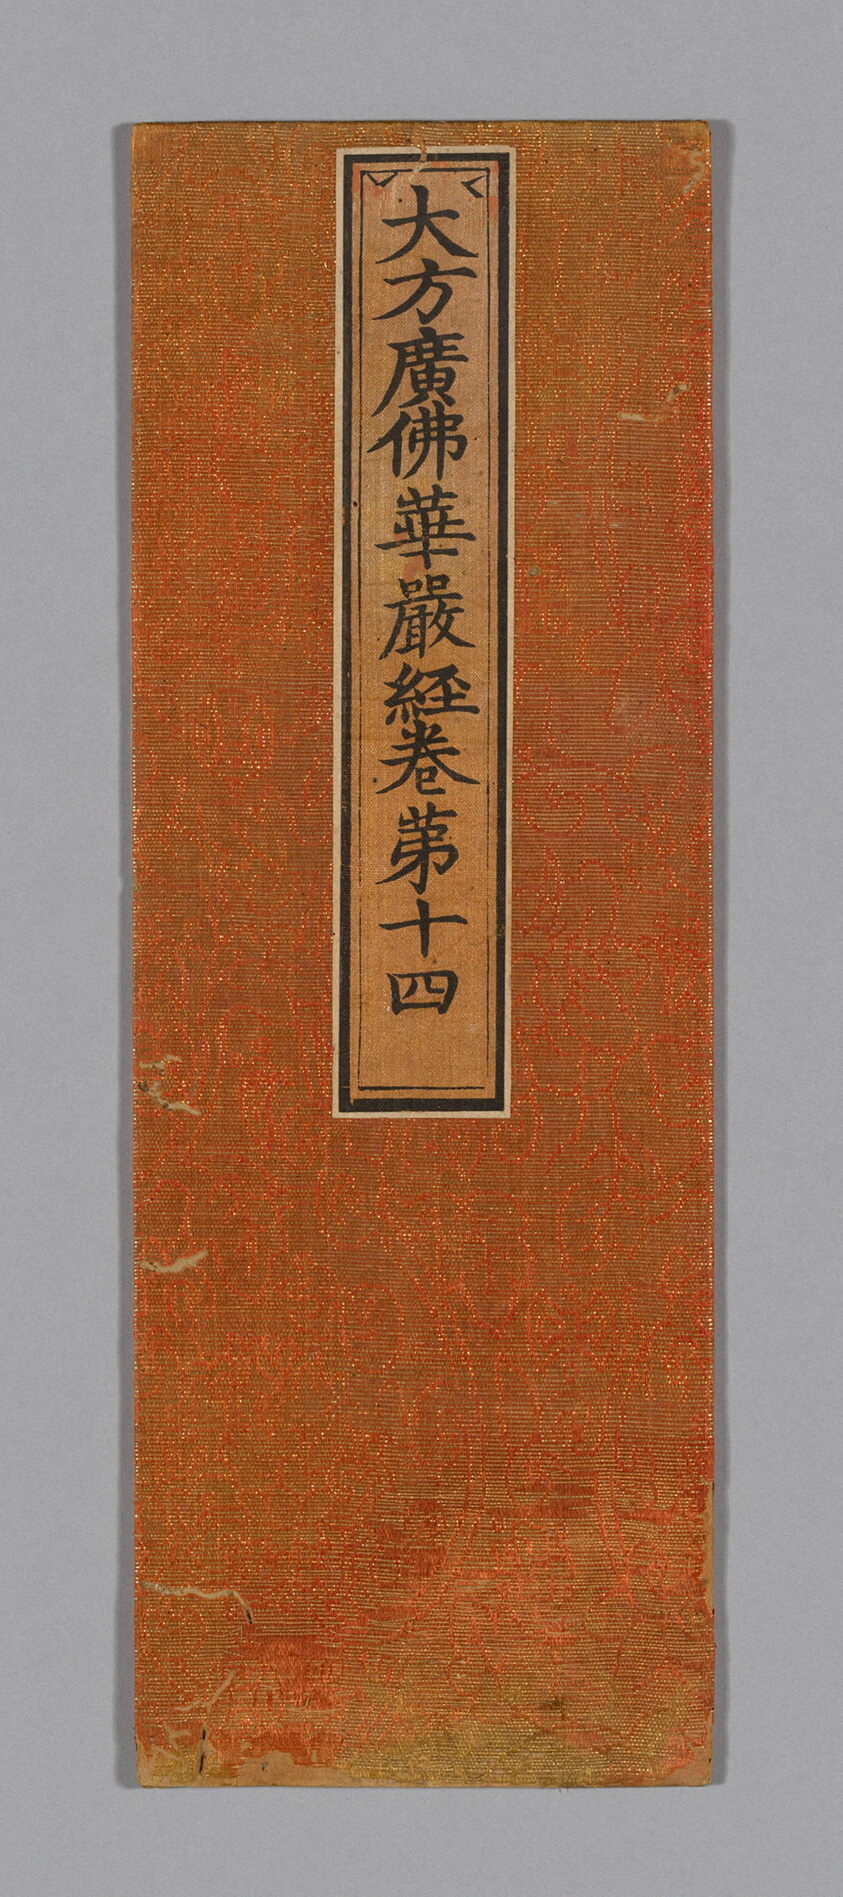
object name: Textile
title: Sutra Cover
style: ming, Chinese (culture or style), East Asian, asian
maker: China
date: Ming dynasty (1368–1644), c. 1590's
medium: Silk and gold-leaf-over-lacquered-paper strip, warp float faced 4:1 satin weave with supplementary patterning wefts bound in weft-float faced 1:4 satin interlacings; label: silk, plain weave; painted with ink and glued to paper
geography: China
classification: textile; weaving